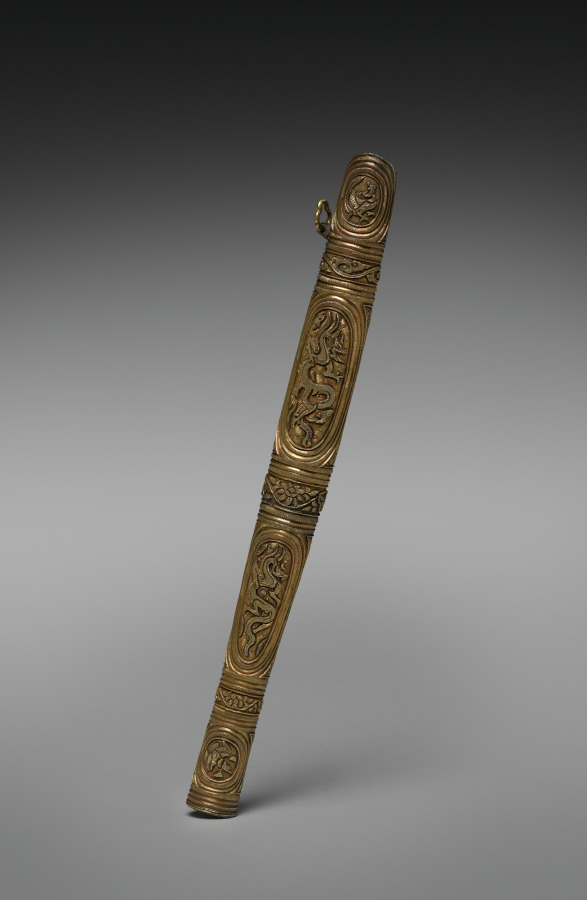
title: Knife Sheath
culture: Korea, Goryeo dynasty (918–1392)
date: 1100s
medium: Gilt silver (body) and brass (trefoil-shaped ring)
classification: Metalwork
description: Made by rolling a flat piece of silver plate, this knife sheath is decorated on each side with oval panels, including two larger middle panels showing an image of rising dragons with ring-punched scales. The circular upper panels bear the image of seated phoenixes. The flat bottom is engraved with a pair of fish, symbolizing harmonious unity. The trefoil-shaped ring attached to the tip of the sheath allows a string to connect it as a pendant to a belt. In medieval Korea, a miniature sheath such as this was considered an important fashion item, especially for elite members of the ruling class.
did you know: This 12th-century silver-gilt knife sheath is meant to be a pendent to a belt as a luxury ornament.